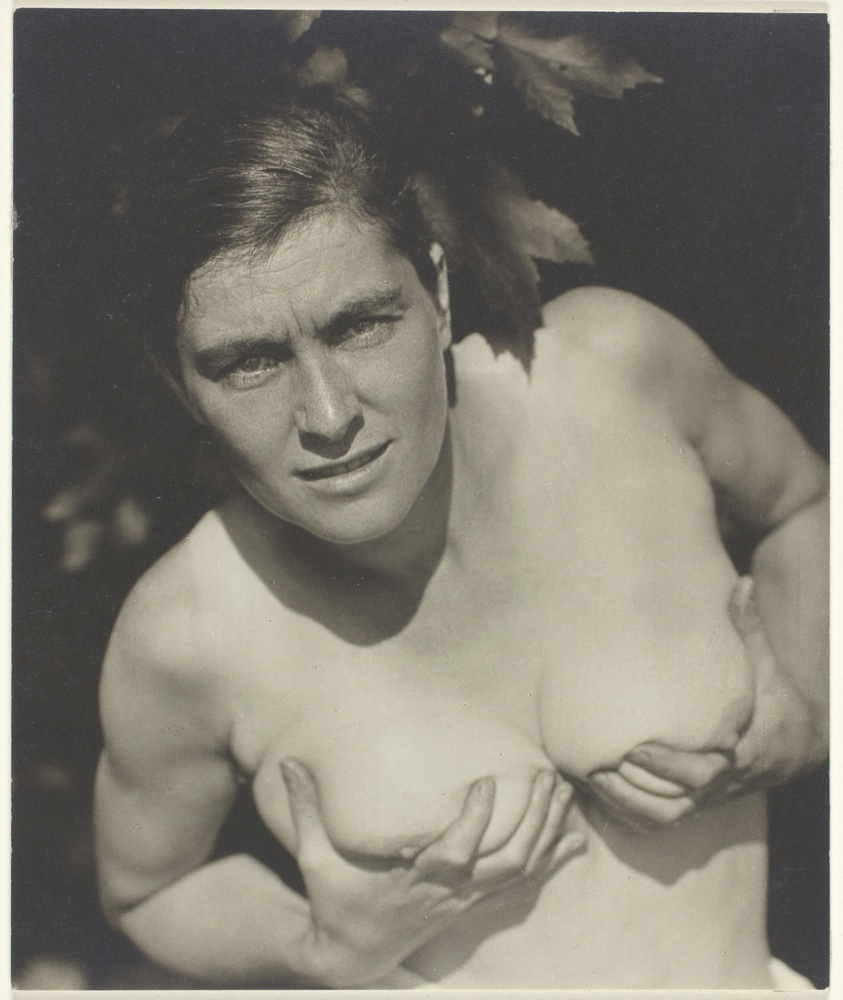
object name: Photograph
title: Rebecca Salsbury Strand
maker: Alfred Stieglitz (American, 1864–1946)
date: 1922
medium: Gelatin silver print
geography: United States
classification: gelatin silver (developing-out-paper) pr; photographic process; photography; photograph